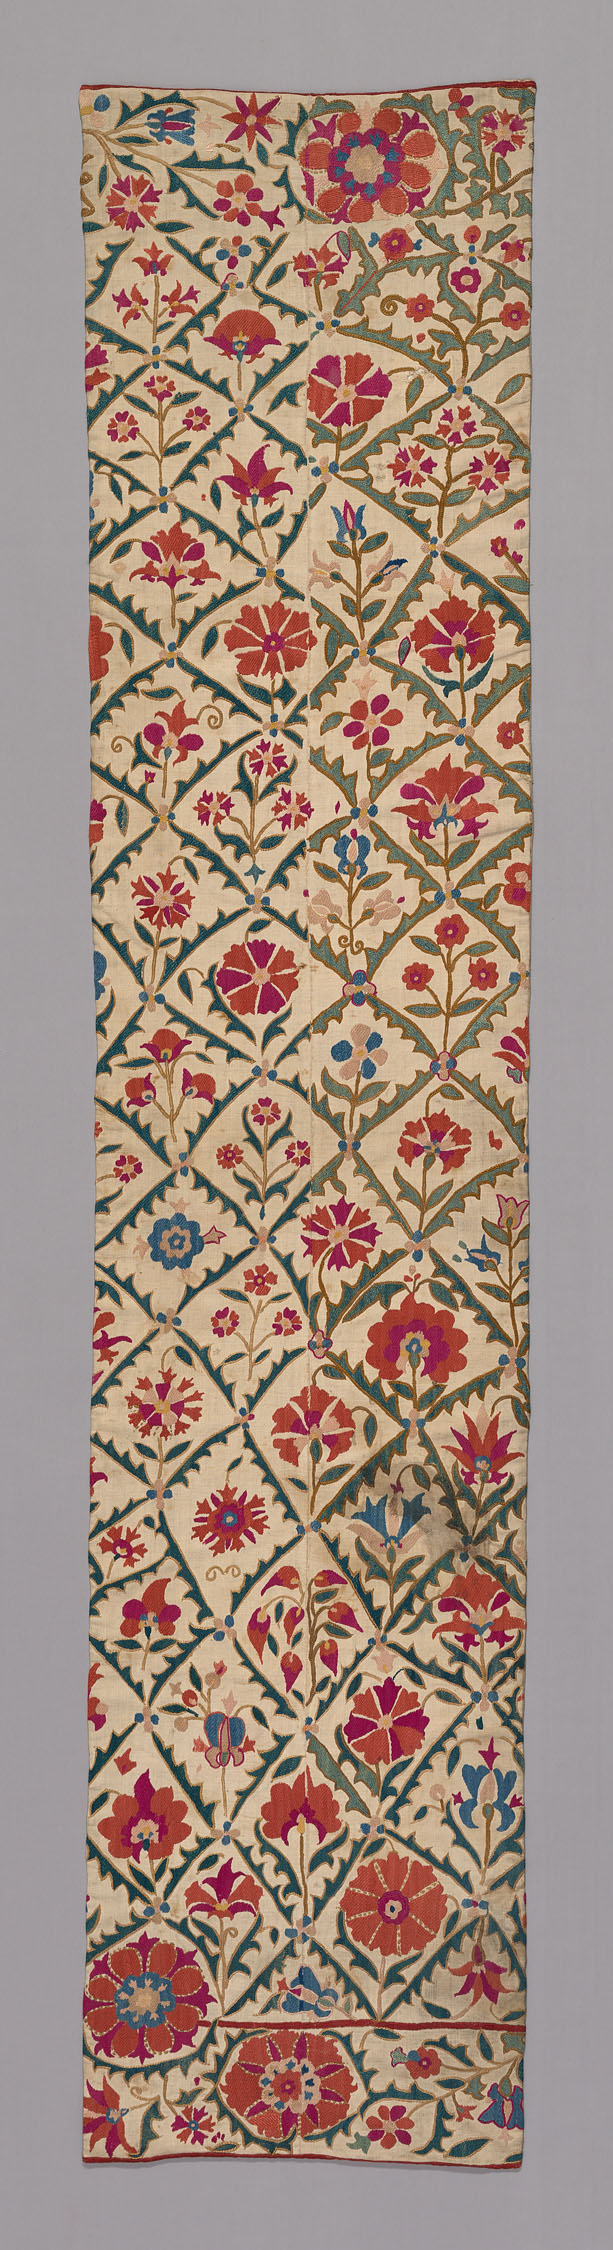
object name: Textile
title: Suzani (large embroidered hanging or cover)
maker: Uzbekistan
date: 1825/75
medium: Linen with design of leaf squares enclosing flower sprays.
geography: Uzbekistan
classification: textile; needlework (visual works)